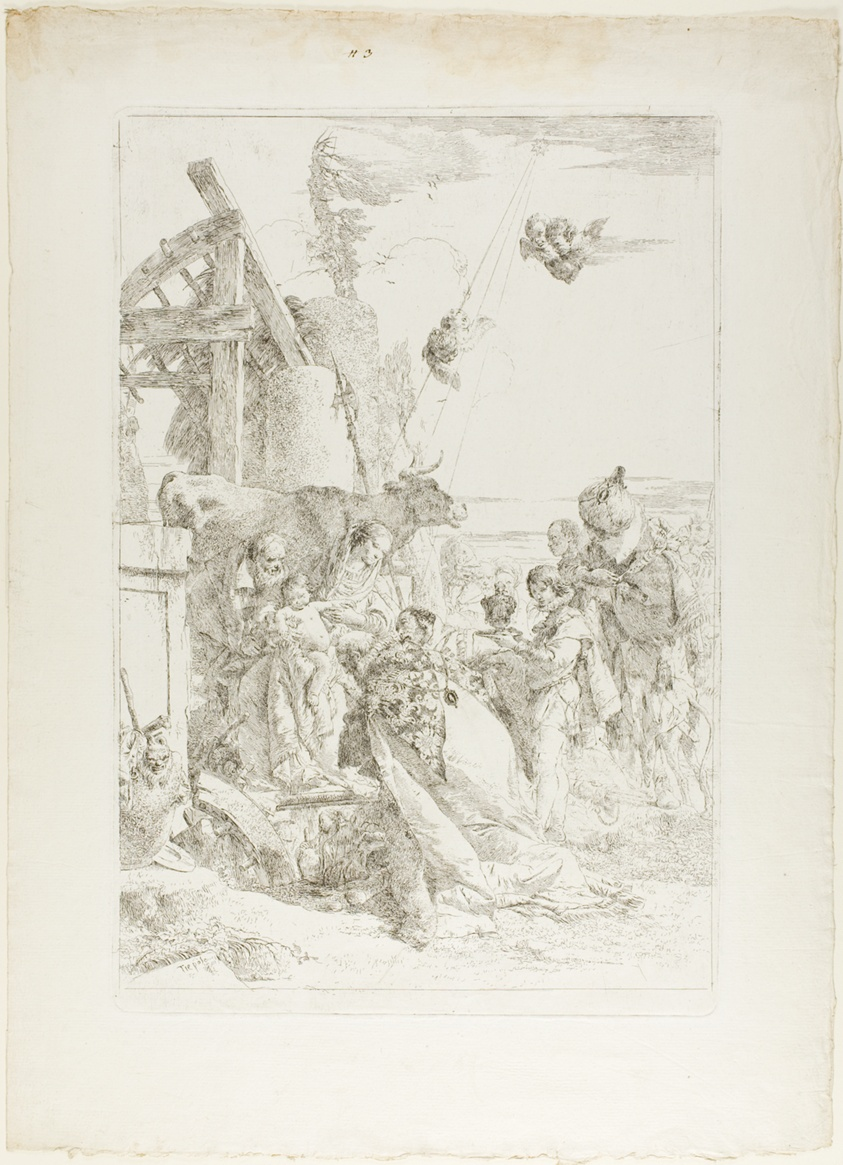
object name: Print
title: Adoration of the Magi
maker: Giovanni Battista Tiepolo (Italian, 1696–1770)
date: c. 1740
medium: Etching on off-white laid paper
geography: Italy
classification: etching; print; prints and drawing